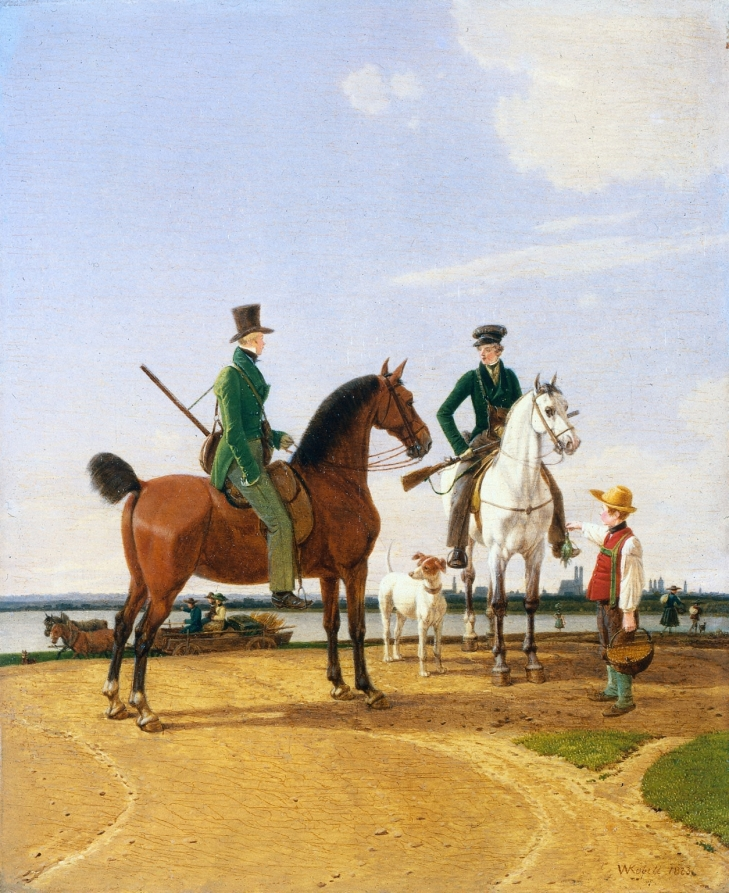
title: Hunter and Lord at the River Isar with View of Munich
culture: Germany, 19th century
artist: Wilhelm von Kobell (German, 1766–1853)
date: 1823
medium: oil on wood panel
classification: Painting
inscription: Signed lower right corner: WKobell 1823 [WK in monogram]